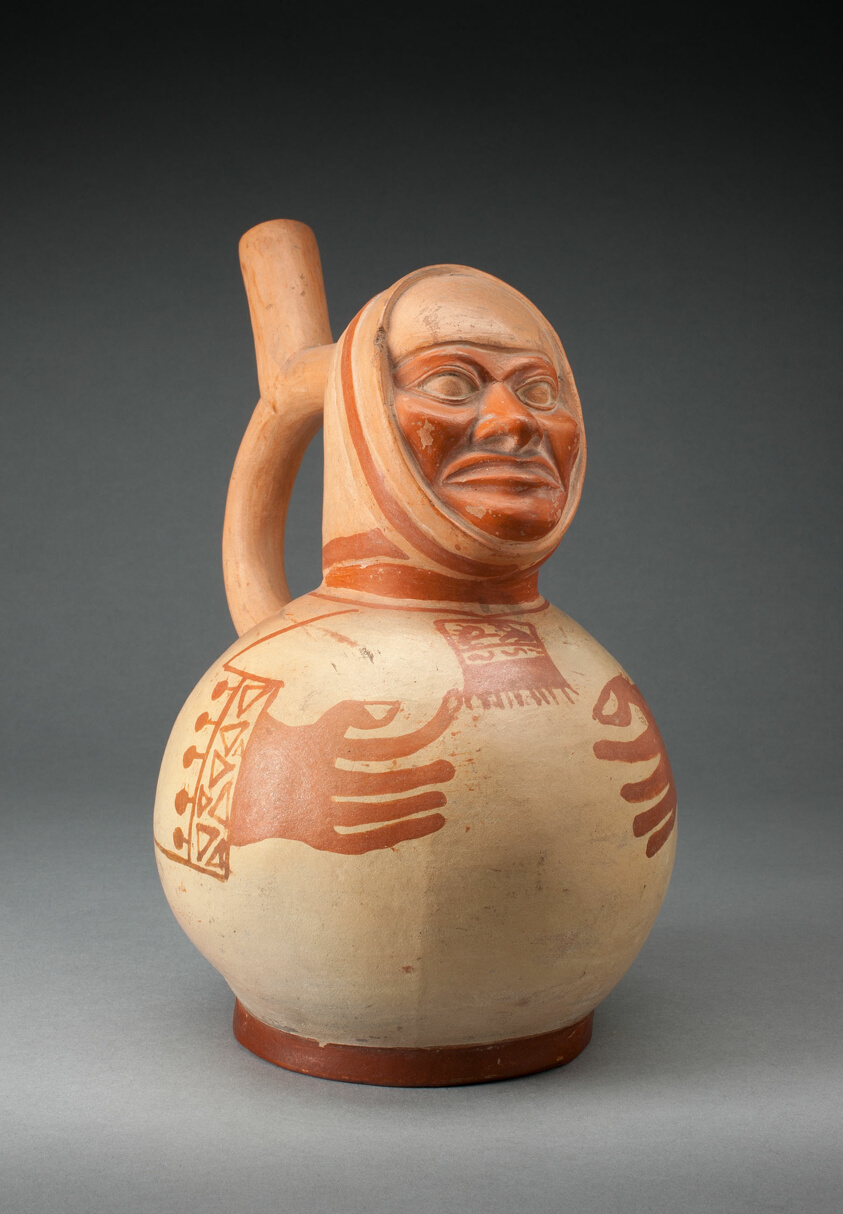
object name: Vessel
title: Vessel in the Form of a Figure with Sculpted Head and Arms and Hands Painted on Surface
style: moche, mochica, early intermediate period, Pre-Columbian, americas, Arts of the Americas, andean, andes, south american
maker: Moche (North coast, Peru)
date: 100 BCE–500 CE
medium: Ceramic and pigment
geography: Peruvian North Coast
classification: earthenware; art of the americas; ceramics; vessel